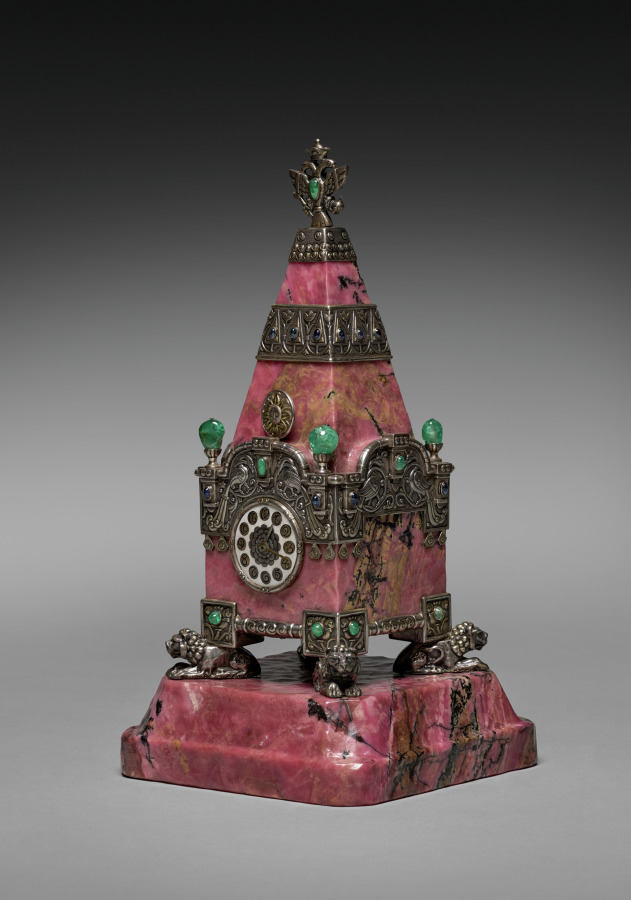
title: Kremlin Tower Clock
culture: Russia, St. Petersburg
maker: House of Fabergé (Russian, 1842–1918)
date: c. 1913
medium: rhodonite, silver, enamel, emeralds, sapphires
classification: Timepiece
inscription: 84, Kokoshnik, delta [assay mark for Moscow, 1908-26]; 91, Kokoshnik; 91; Kokoshnik; C. Fabergé (in Cyrillic); double-headed eagle [imperial warrant]; 16419 k? scratched.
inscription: Painted on clock face: Le Gruet (in script); strike, silence, set hand work (in English).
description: The use of Russian hardstones in creating precious objects became a hallmark of design from the House of Fabergé. Easily carved, these minerals were sourced largely from the western region surrounding the Ural Mountains. Fabergé's workmasters used colorful stones such as agate, nephrite (jade), lapis lazuli, rock crystal, and rhodonite, seen here in this elaborate table or mantel clock, to create all manner of luxurious accessories. Bright pink rhodonite was among the rarest, and consequently most expensive, specimens used by the House of Fabergé. This clock resembles the Taynitskaya Tower, the middle tower on the south side of the Kremlin. The House of Fabergé created this work to commemorate the 300th anniversary of the Romanov dynasty, representing Fabergé's ability to balance the functionality of objects with intricate decorative design.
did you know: The Kremlin tower, which this clock resembles, has a secret well and an underground tunnel that leads to the Moscow River.